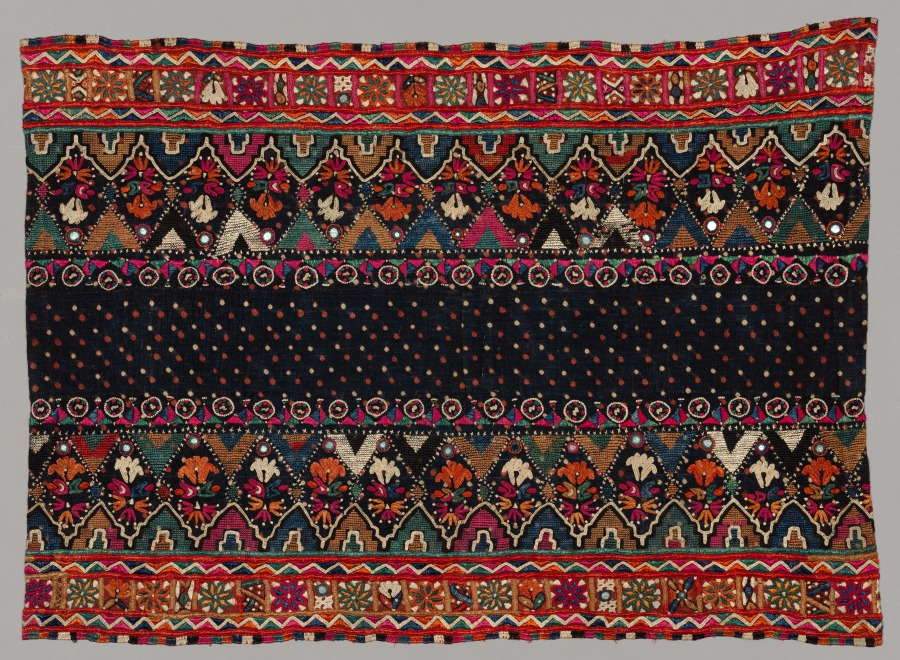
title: Shawl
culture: India, Kathiawar, 19th century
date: 1800s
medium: embroidery: silk on cotton tabby ground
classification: Embroidery